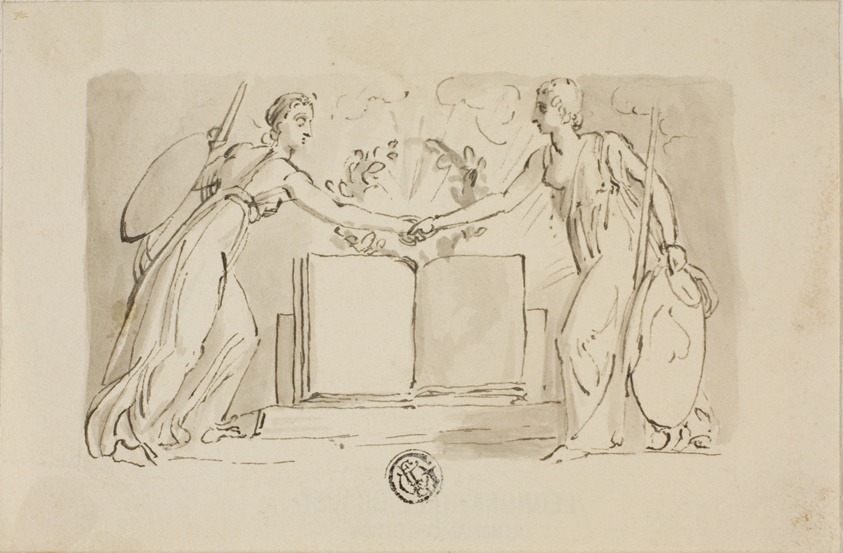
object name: Drawing and Watercolor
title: Two Allegorical Female Figures Clasping Hands before Book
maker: Attributed to Thomas Stothard; English, 1755-1834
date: 1830/34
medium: Pen and black ink with brush and gray wash, on cream wove paper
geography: England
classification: pen and ink drawings; drawings (visual works); prints and drawing